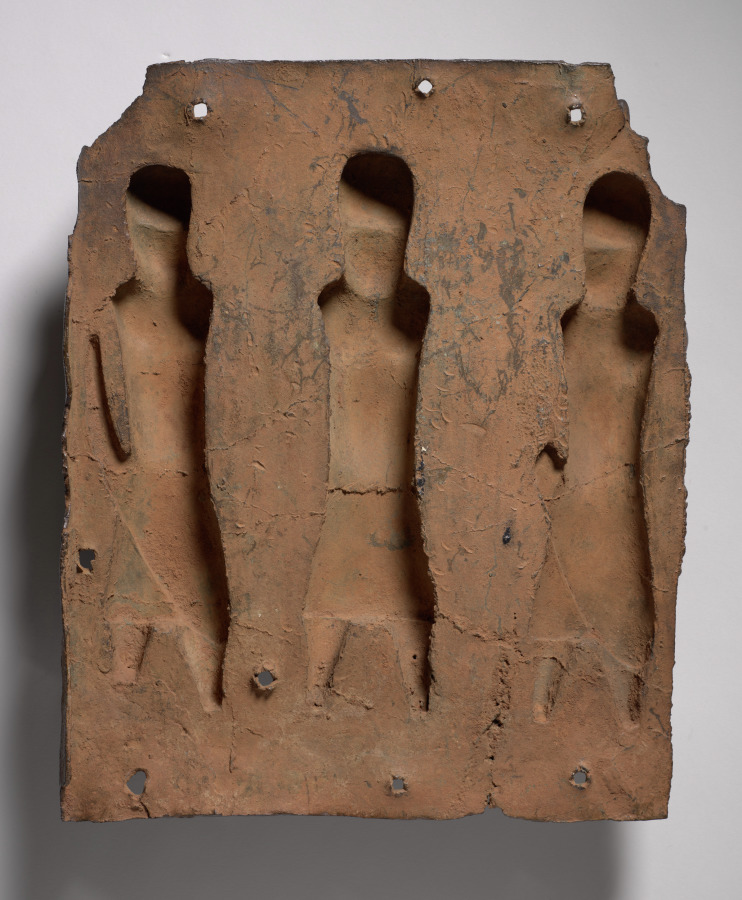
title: Plaque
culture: Nigeria, Benin Kingdom, Ẹdo peoples, members of the Igun Eronmwon (royal brasscasters) guild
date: 1500s–1600s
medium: Copper alloy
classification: Sculpture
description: Nearly 900 metal plaques once adorned the Ọba’s palace courtyard, documenting Benin’s history and customs. This one depicts two male attendants (enobore) supporting an Ọba. It uses hierarchical composition: important figures are large and centered. Everything about the Ọba is greater than his companions: their bodies, clothing, and jewelry. The flanking attendants physically support a man weighed down by heavy royal garments and responsibilities. Brasscasters skillfully cast their clasping hands projecting from the plaque. The bottom left number means the British Museum formerly owned this. It entered their collection in 1898, one year after British troops took it from a palace storeroom during the Siege of Benin.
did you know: Look at the side of this plaque. The designs on the slender edges are considered visual "signatures" of the different casters who made plaques for the Oba of Benin.